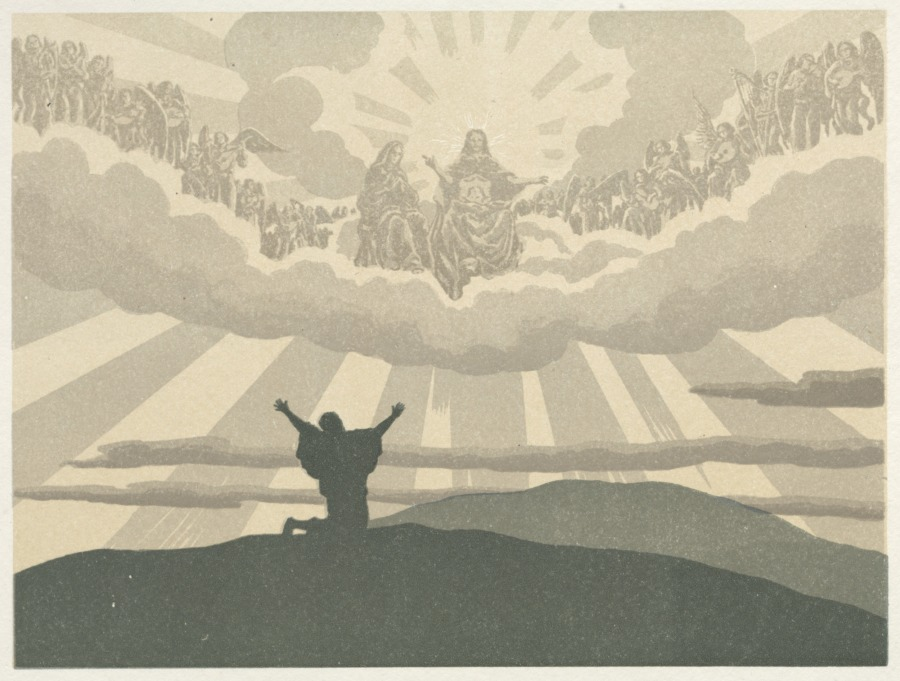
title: The Wandering Jew: Heaven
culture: France, 19th century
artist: Henri Rivière (French, 1864–1951)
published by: Verneau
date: 1896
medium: color lithograph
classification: Portfolio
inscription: title page is signed, in blue crayon: Henri Rivière